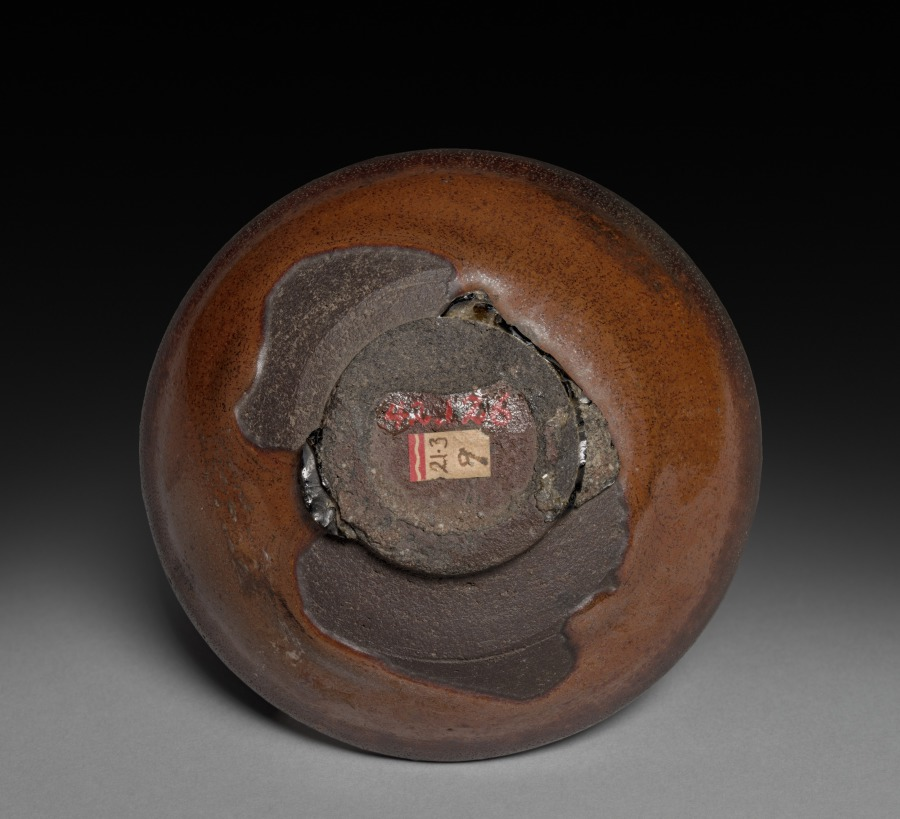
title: Tea Bowl: Jian ware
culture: China, Fujian province, Song dynasty (960-1279)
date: 960– 1279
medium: stoneware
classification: Ceramic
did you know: Jian ware was very popular with the tea cultures in China and Japan.